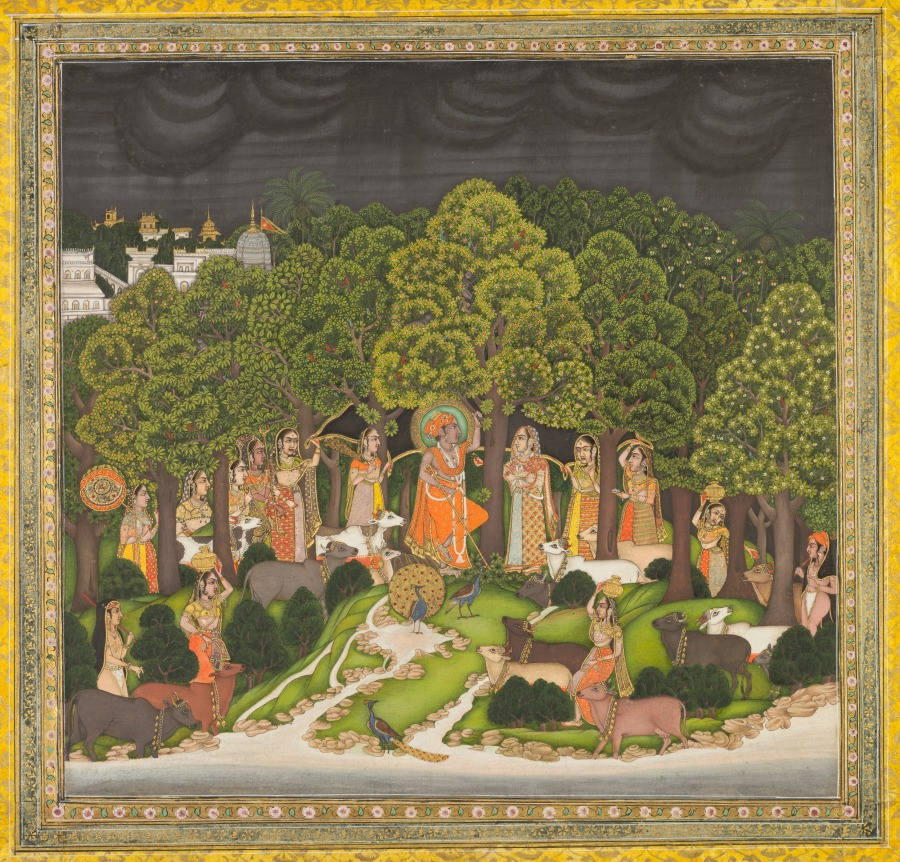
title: Radha and Krishna meet in the forest during a storm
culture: India, Bengal, Mughal, 18th century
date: c. 1770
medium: Gum tempera and gold on paper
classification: Painting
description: This painting depicts the Hindu deity Krishna as a youth among the villagers of the cowherding community where he grew up. Drawn to him, the women hurry to hold a coverlet over him in protection from the rain, not realizing that he is able to lift a mountain to shield them all. Birds and monkeys populate the trees, and a Hindu temple and palace buildings stand in the background. This vibrant work was probably made for an aristocratic Hindu ruler of territories in eastern India during the period when Mughal artists dispersed from the imperial center after the invasion of Delhi in 1739.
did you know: The belly of the white cow has been colored orange with henna.